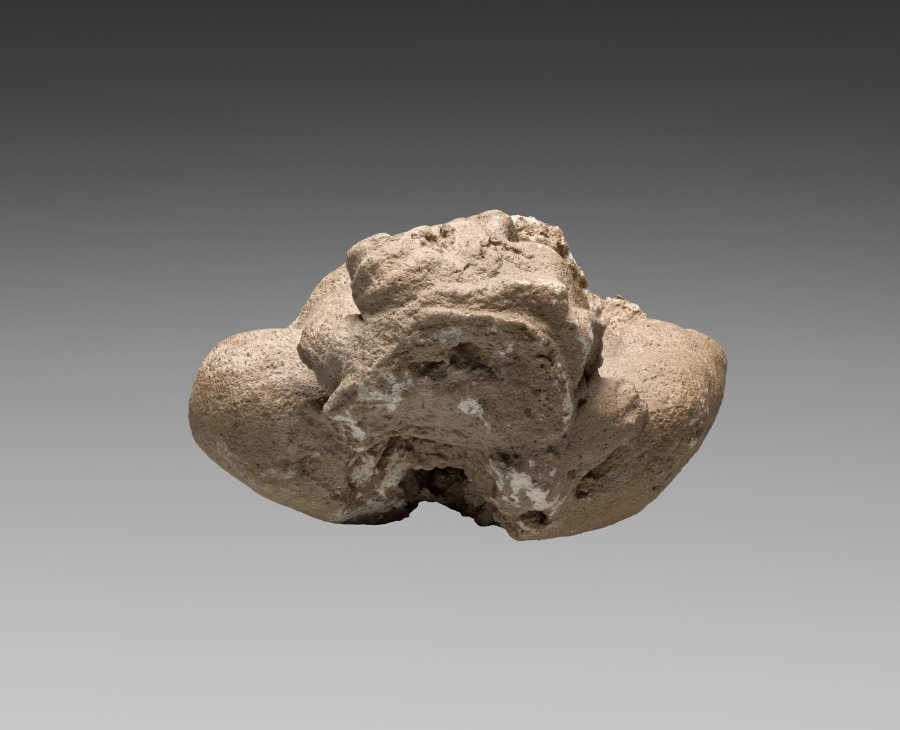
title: Male Atlantean figure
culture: Afghanistan, Hadda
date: c. 300 CE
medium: stucco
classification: Sculpture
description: The musculature, thick curly locks of hair, and deeply inset eyes of this fragmentary figure show the sculptor's incorporation of Greco-Roman forms. His hunched posture suggests that he supported a heavy weight, such as the dome of a stupa on his back. Rows of figures would have visually supported the stupa, in which relics of the Buddha or other revered Buddhist leader were interred.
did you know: Most sculptures from Hadda are preserved in museums, since the site was razed in 2001.